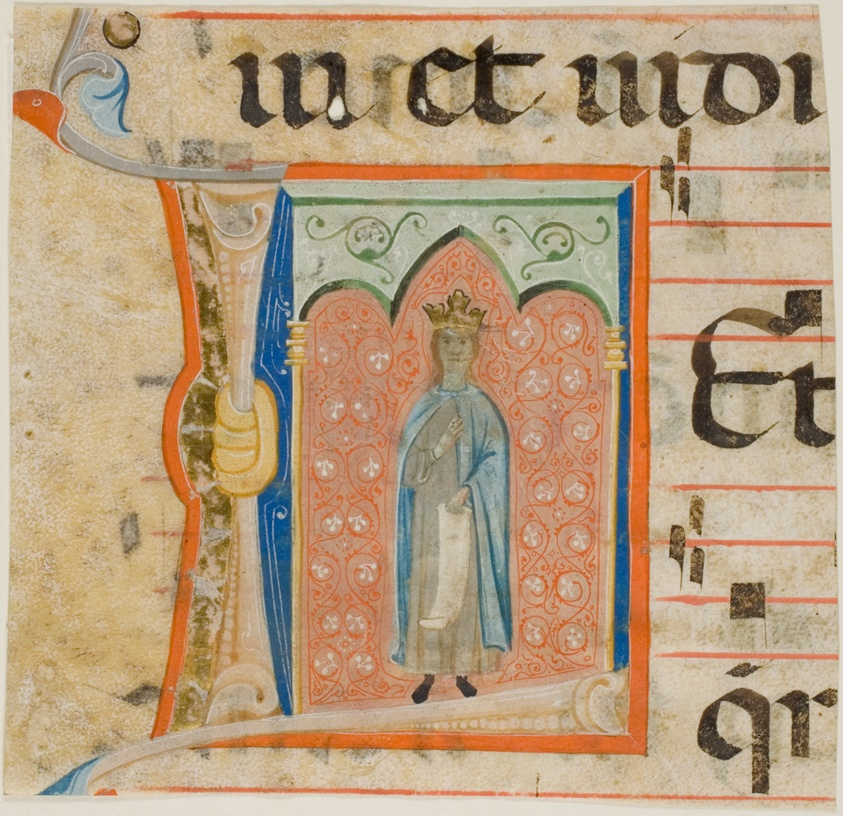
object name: Drawing and Watercolor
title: Female Saint in a Historiated Initial "L" from a Choir Book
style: medieval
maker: Italian (Florence); circle of the Master of the Dominican Effigies (Italian, active 1328-1350)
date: 1330/40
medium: Manuscript cutting in tempera and gold leaf, with gothica textura inscriptions in Latin in black ink, ruled in red, on parchment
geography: Italy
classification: tempera; manuscript; drawings (visual works); prints and drawing